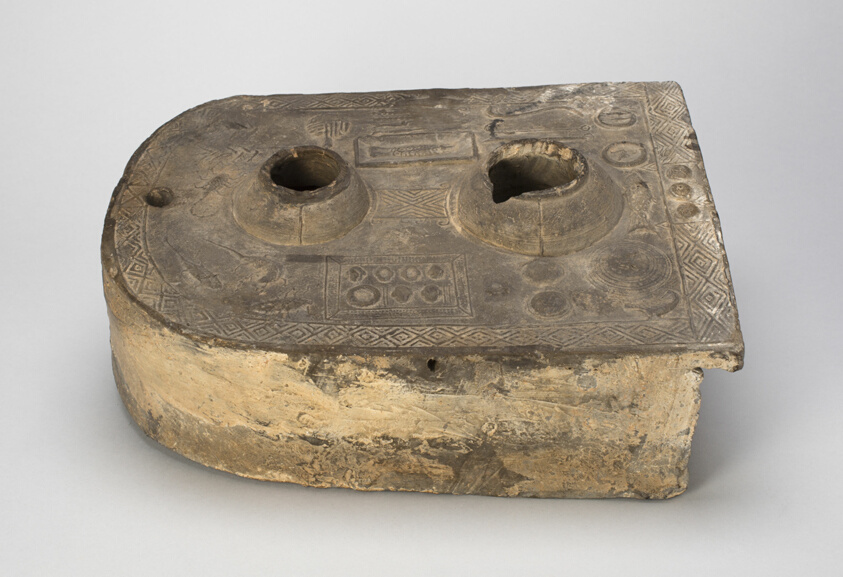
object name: Sculpture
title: Model of Stove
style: Chinese (culture or style)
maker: China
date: Eastern Han dynasty, 25–220 CE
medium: Gray earthenware with molded relief decoration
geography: China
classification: earthenware; ceramics; sculpture; asian art